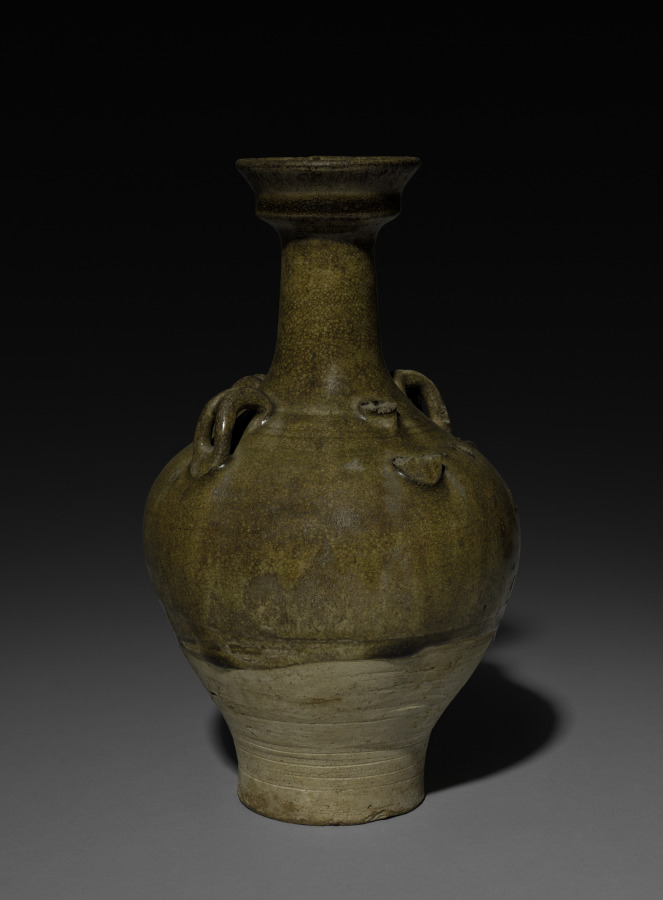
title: Vase with Loop Handles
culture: China, Sui dynasty (581-618)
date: 581–618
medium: glazed stoneware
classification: Ceramic